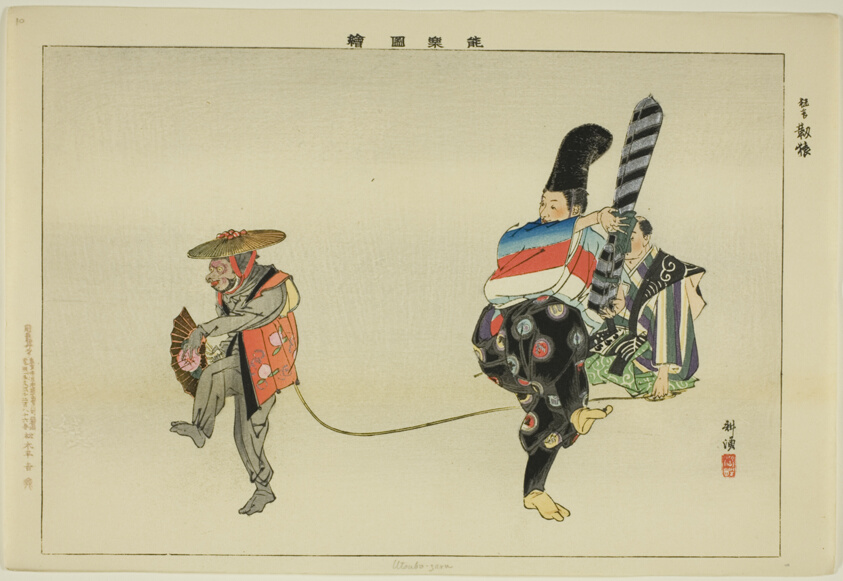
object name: Print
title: Utsubo-saru, from the series "Pictures of No Performances (Nogaku Zue)"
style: Japanese (culture or style)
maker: Tsukioka Kogyo; Japanese, 1869-1927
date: 1898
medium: Color woodblock print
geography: Japan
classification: woodblock print; print; asian art